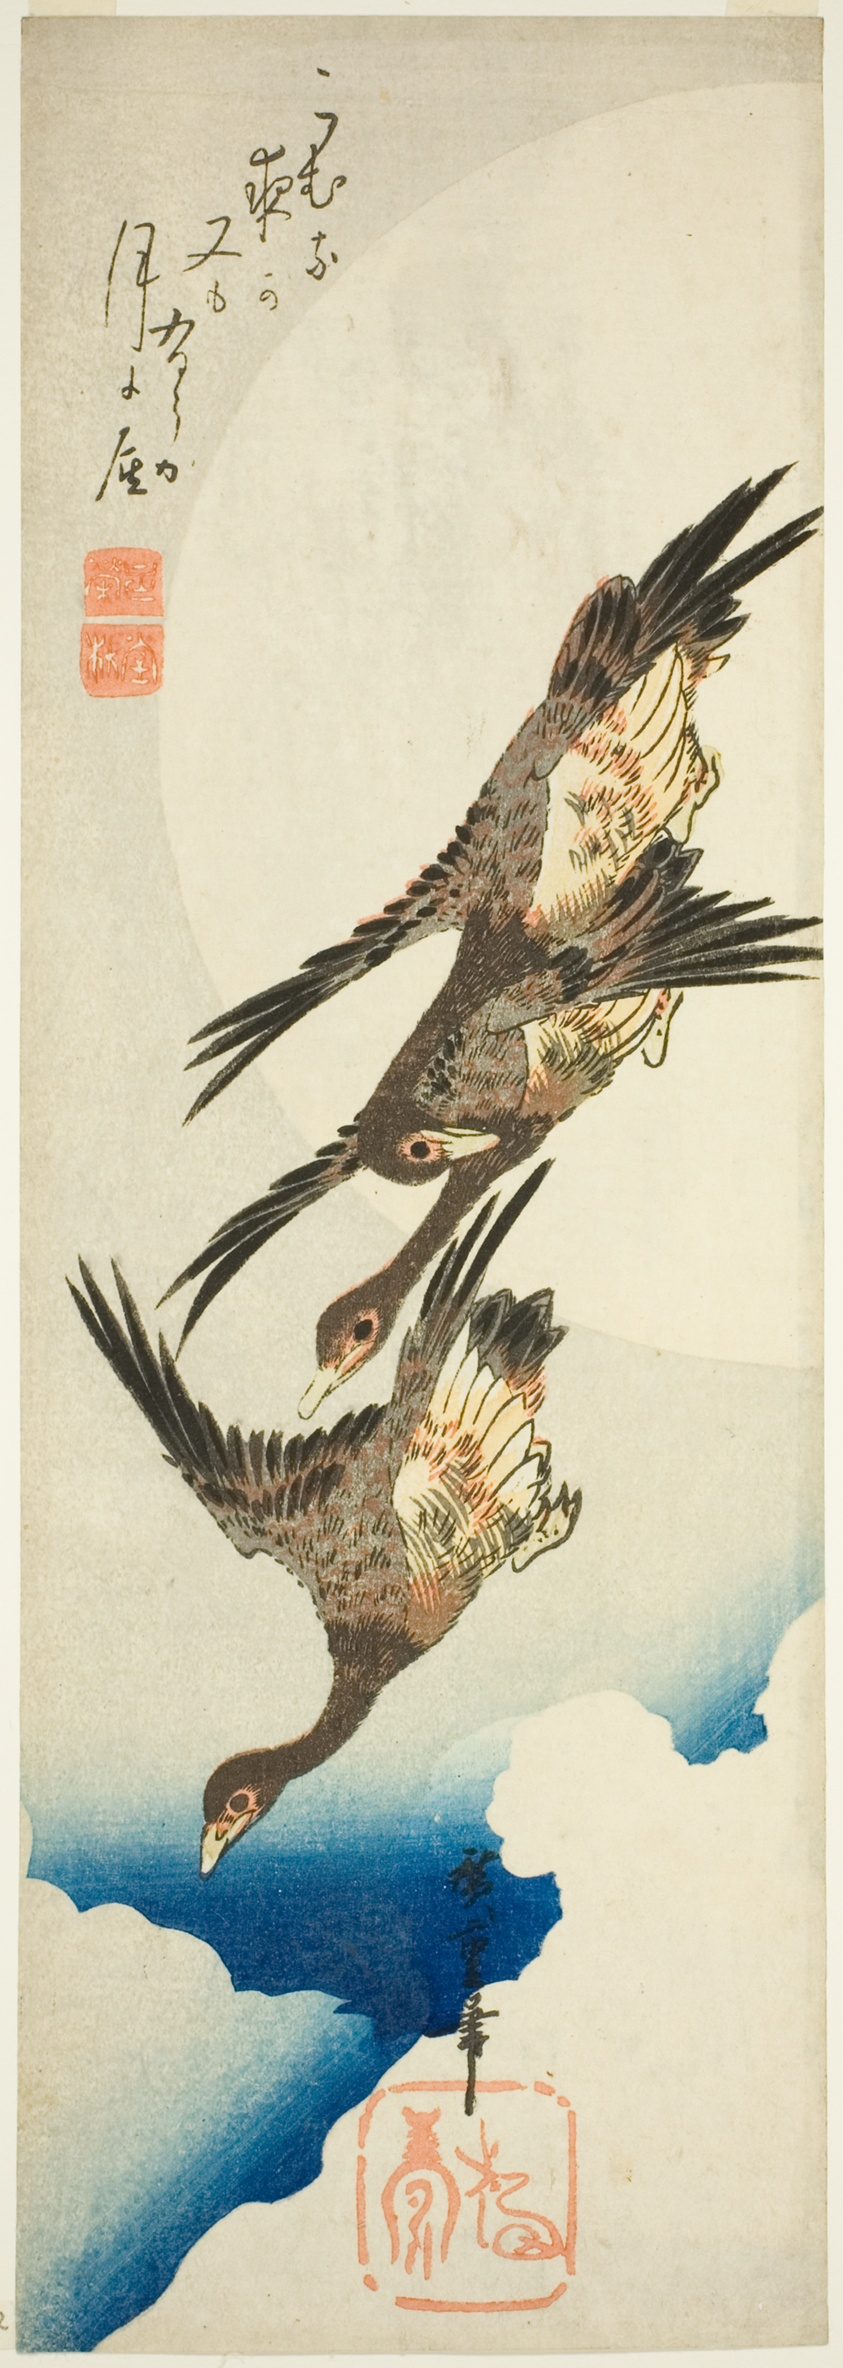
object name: Print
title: Flying geese and full moon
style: Japanese (culture or style)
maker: Utagawa Hiroshige 歌川 広重; Japanese, 1797-1858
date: early 1830s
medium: Color woodblock print; chutanzaku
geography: Japan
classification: woodblock print; print; asian art